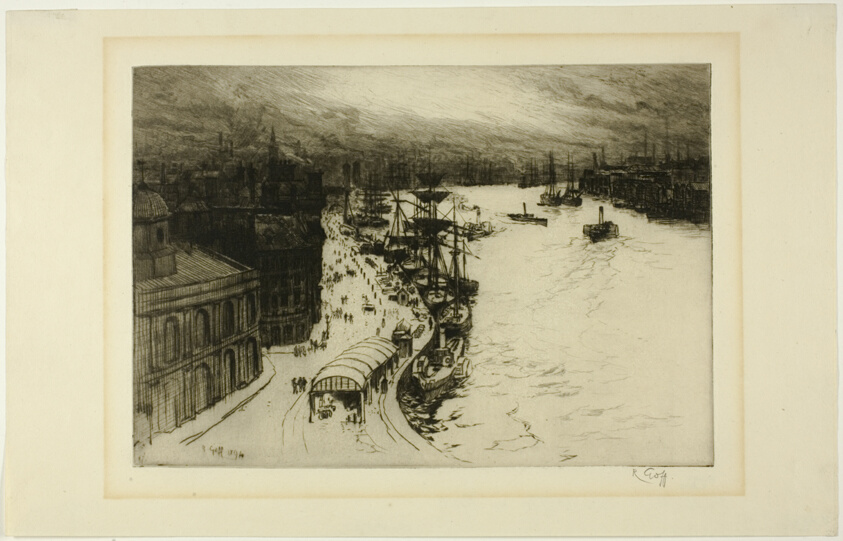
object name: Print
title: Newcastle on the Tyne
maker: Robert Goff; English, 1837-1922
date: 1894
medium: Etching in black on ivory wove paper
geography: England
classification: etching; print; prints and drawing